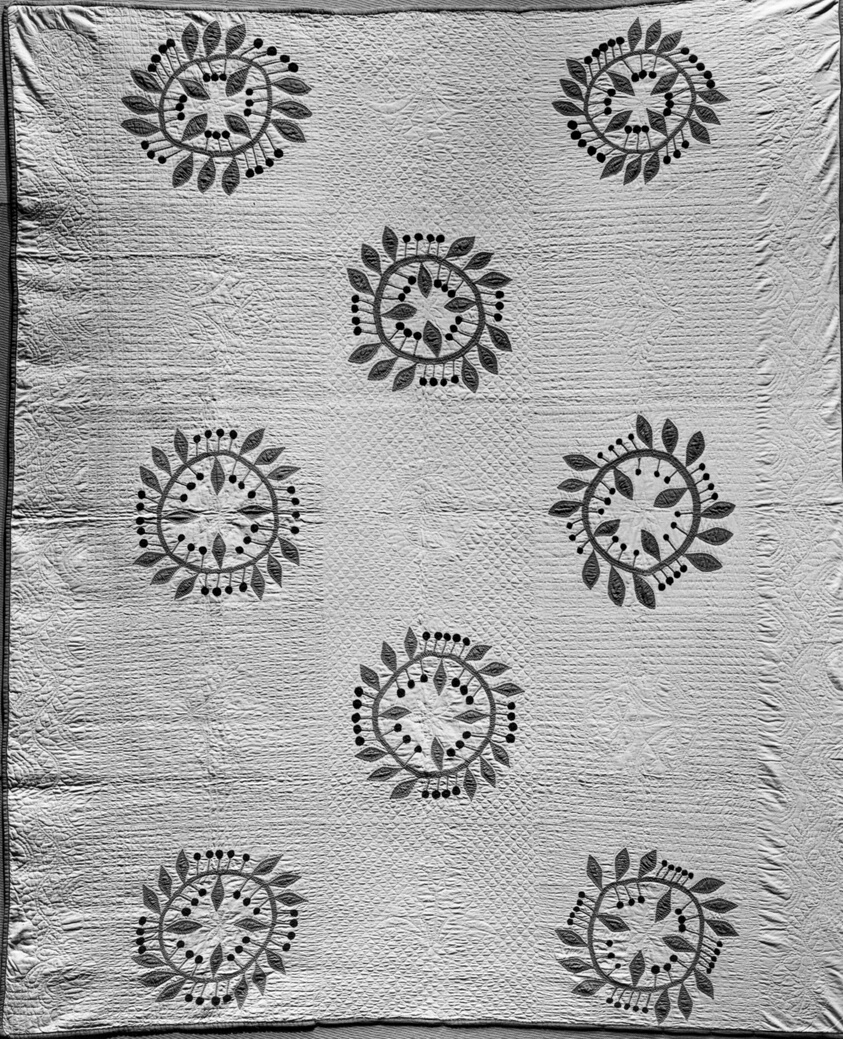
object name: Textile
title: Bedcover (Cherry Wreaths Quilt)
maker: Kate (née Reed) DeCamp Campbell (American, 1846?-1910); United Sates, Indiana, Frankfort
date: c. 1865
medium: Cotton, plain weave, pieced; appliquéd with cotton, plain weave; quilted; backed with cotton, plain weave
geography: Indiana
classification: textile; needlework - quilt